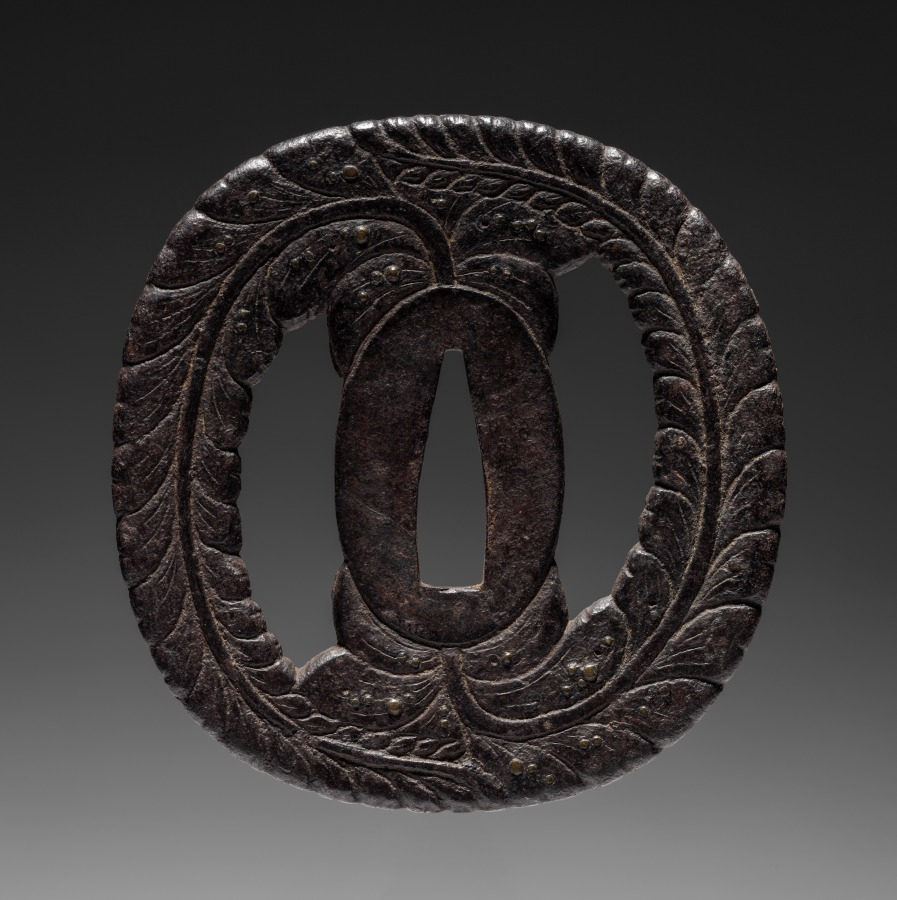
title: Sword Guard (Tsuba)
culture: Japan, possibly Edo period (1615-1868)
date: c. 1615–1868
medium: iron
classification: Arms and Armor